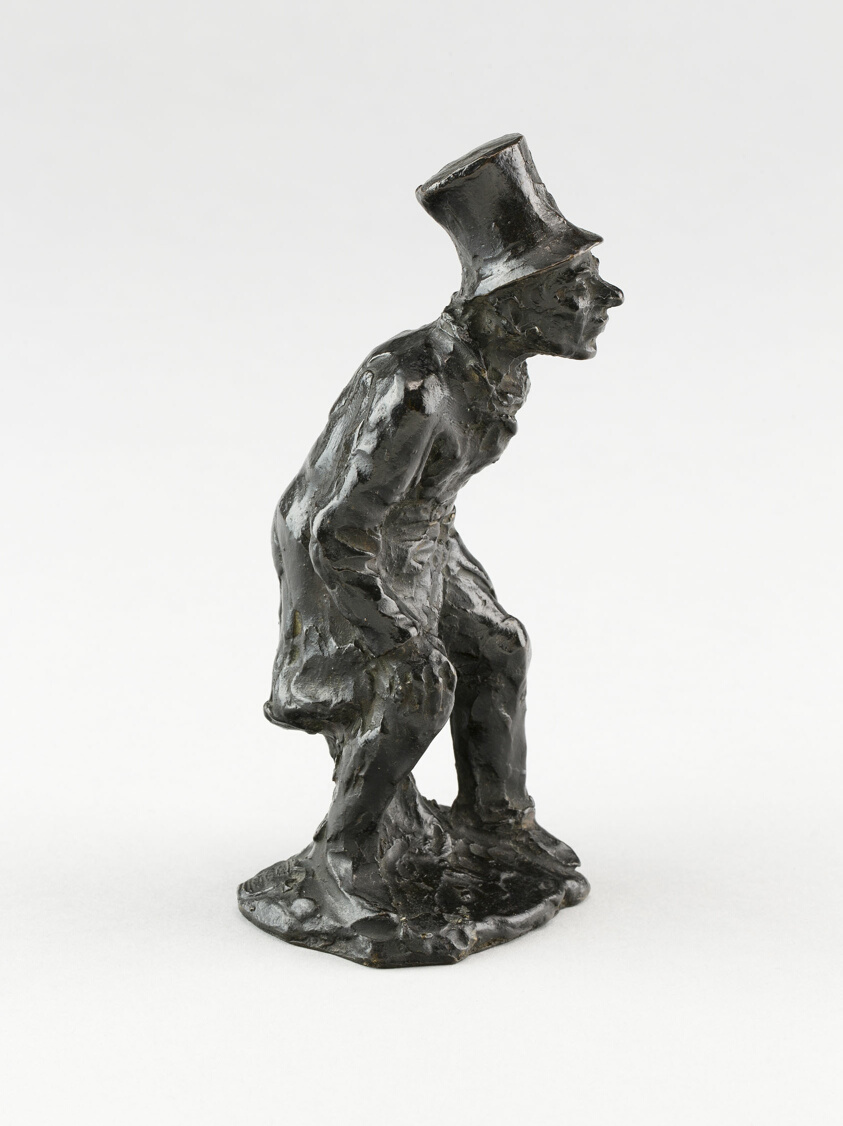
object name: Sculpture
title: The Vagrant (Le rodeur ou le ramasseur de bouts cigares)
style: nineteenth century, 19th century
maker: Style of Honoré-Victorin Daumier (French, 1808–1879)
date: c. 1832/35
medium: Bronze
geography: France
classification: statuette; french; bronze; sculpture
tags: figure, portraits, portrait: French subject, portrait, man, French, figures